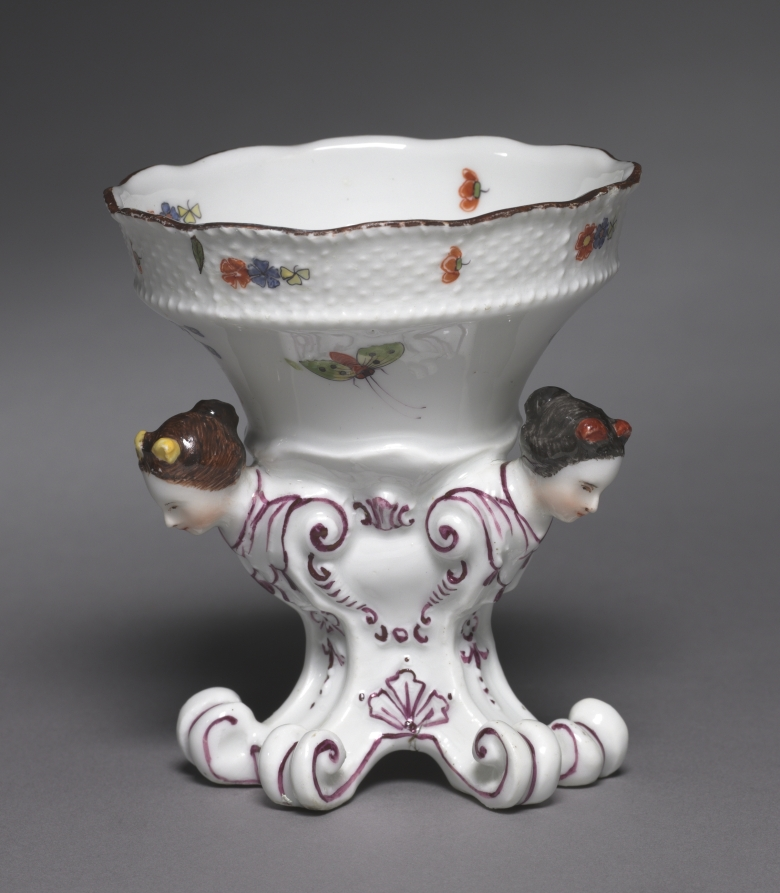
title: Salt Cellar from the Sulkowsky Service (2 of 2)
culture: Germany, Meissen, 18th century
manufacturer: Meissen Porcelain Factory (German, est. c. 1710)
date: 1735–1756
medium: hard-paste porcelain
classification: Ceramic